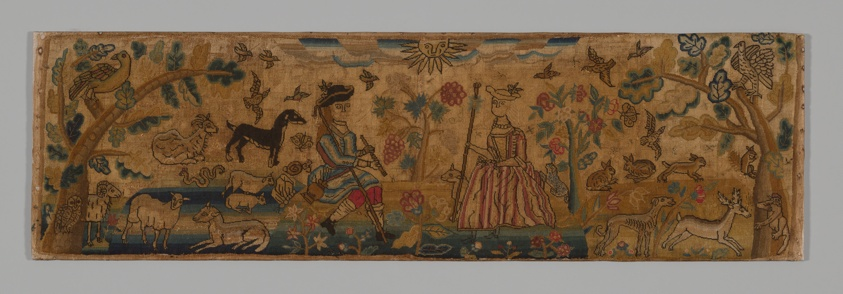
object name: Textile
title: Panel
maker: England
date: 1701/25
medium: Linen, plain weave; embroidered with silk and wool in tent stitches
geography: England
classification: textile; needlework (visual works)